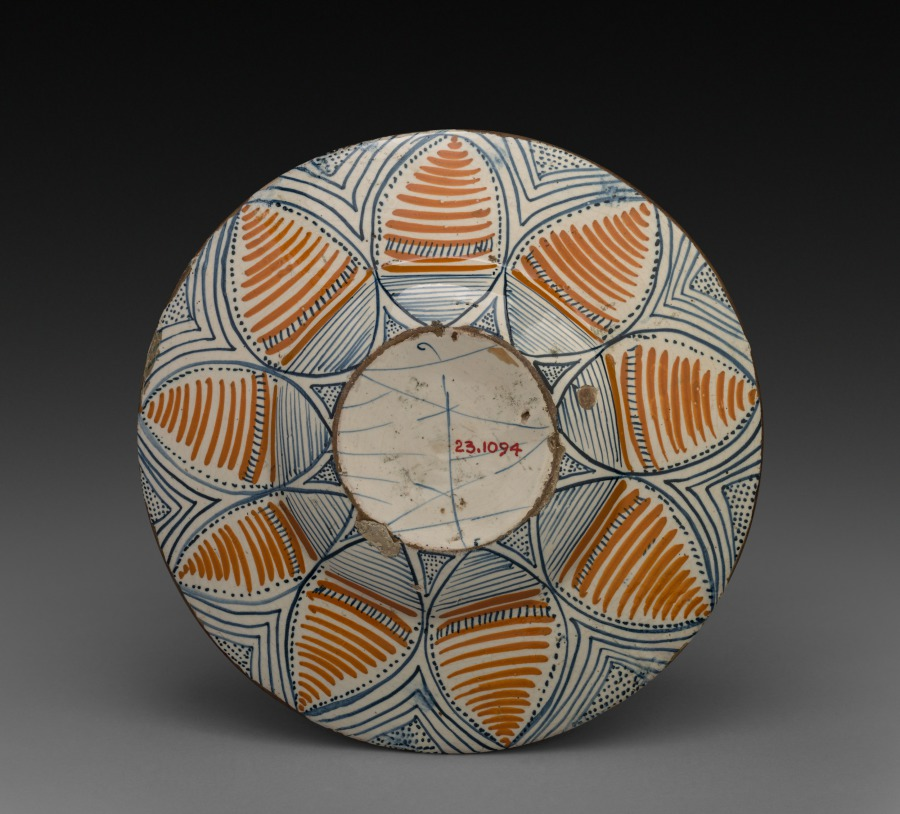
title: Plate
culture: Italy, 16th century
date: 1500s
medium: tin-glazed earthenware (maiolica)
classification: Ceramic